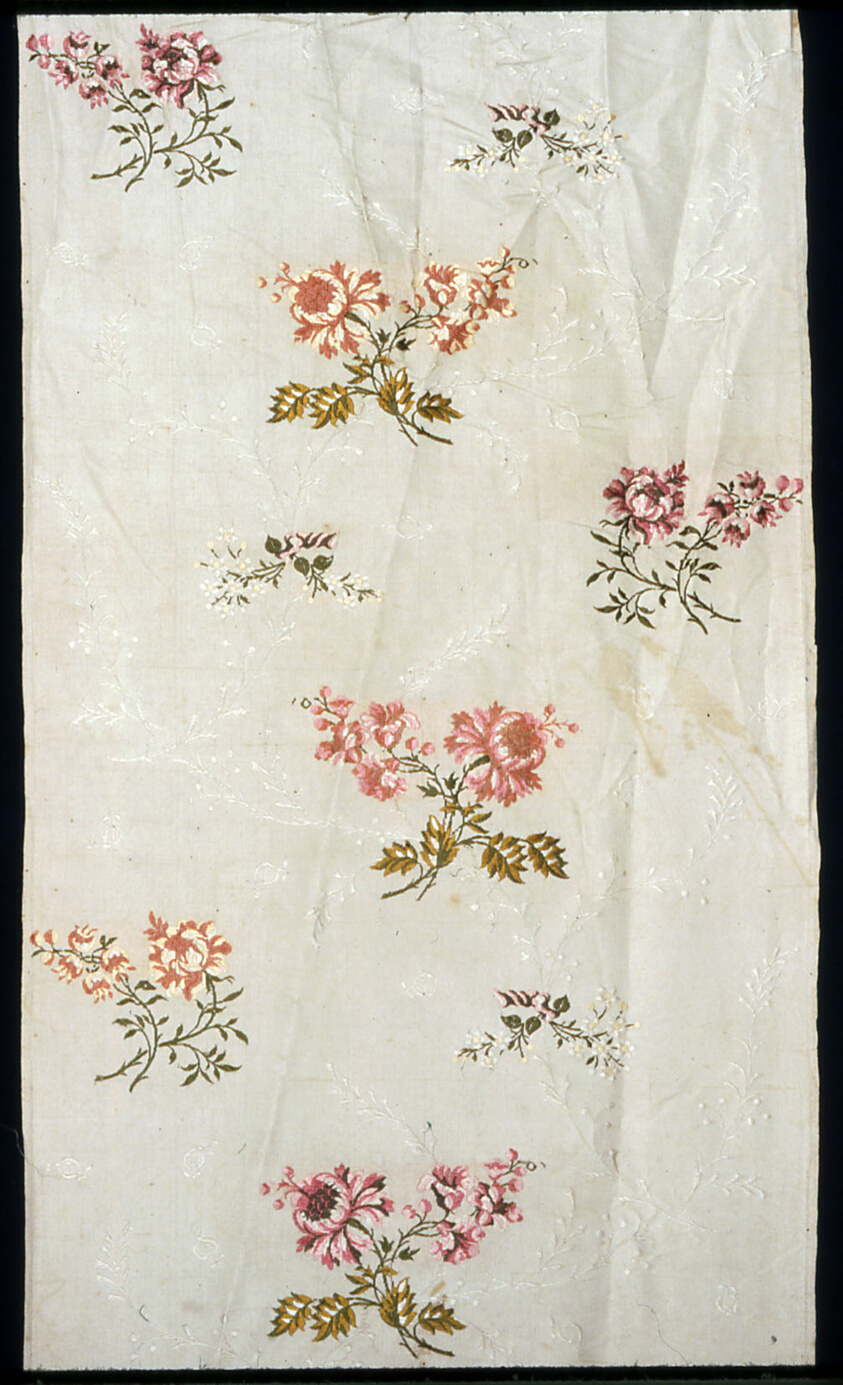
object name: Textile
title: Panel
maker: England, Spitalfields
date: 1725/50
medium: Silk, plain weave with supplementary brocading wefts; self-patterned by main warp and ground weft floats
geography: Spitalfields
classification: textile; weaving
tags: flowers, foliage, floral arrangements